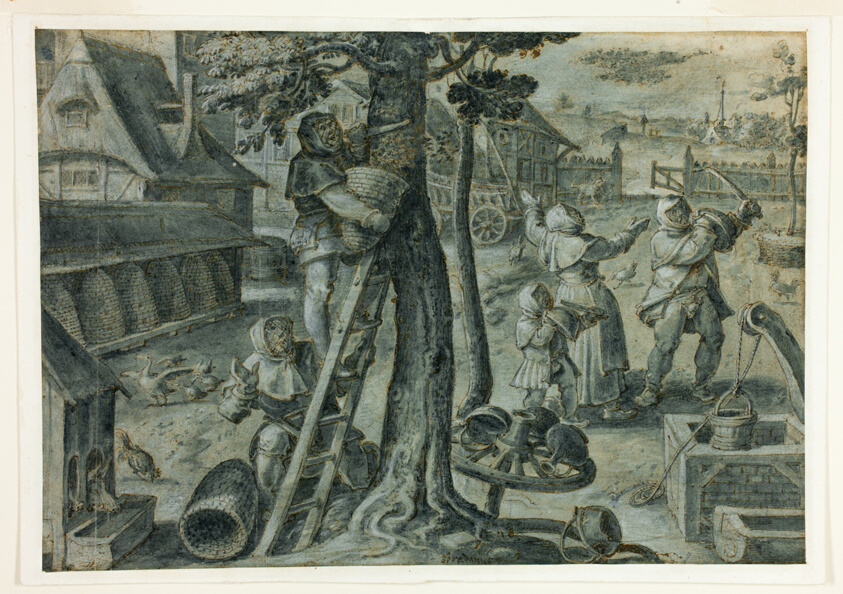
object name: Drawing and Watercolor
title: The Capture of a Swarm of Bees in a Farmyard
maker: Joannes Stradanus, called Giovanni Stradano; Flemish, 1523-1605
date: 1578/1605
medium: Pen and brown ink and blue watercolor, with opaque white watercolor, over black chalk, on cream laid paper, incised with a stylus for transfer, laid down on cream laid paper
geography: Flanders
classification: pen and ink drawings; prints and drawing; paper